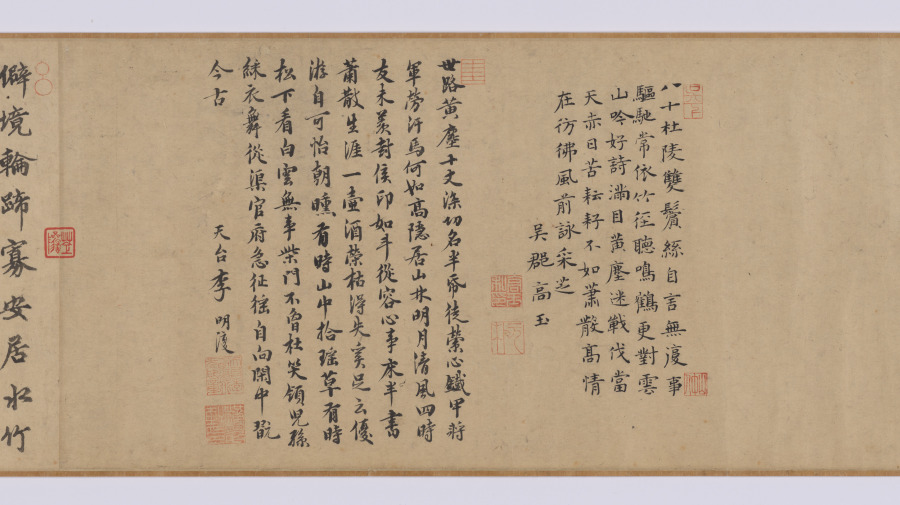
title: Leisure Enough to Spare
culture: China, Yuan dynasty (1271-1368)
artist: Yao Tingmei (Chinese, active mid-1300s)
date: 1360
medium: handscroll, ink on paper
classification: Painting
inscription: 至正廿年春正月_日作此併系鄙語于尾 地偏人遠閉柴關，滿院松陰白晝閒。 眼底風塵渾忘却，坐看流水臥看山。 吳興姚廷美畫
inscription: 23 colophons and 53 seals (dates unavailable for some): 1 colophon, dated 1360, and 2 seals of Yang Weizhen (1296-1370); 1 colophon and 3 seals of Wan Yi; 1 colophon of Zhang Junde; 1 colophon and 3 seals of Angji (act. ca. mid-14th c.); 1 colophon and 1 seal of Xu Shiquan; 1 colophon and 3 seals of Gao Yu; 1 colophon and 2 seals of Li Mingfu; 1 colophon and 2 seals of Lu Lin; 1 colophon and 1 seal of Zhang Qian; 1 colophon of Tao Tangwen; 1 colophon and 1 seal of Wu Yuangui (act. ca. 1300-60); 1 colophon of Bao Jiong; 1 colophon of Wang Zao; 1 colophon and 1 seal of Ma Chuyi; 1 colophon and 1 seal of Lin Yizhuang; 1 colophon and 1 seal of Gu Shunju; 1 colophon and 2 seals of Wang Jing; 1 colophon and 2 seals of Lin Shouchang; 1 colophon and 1 seal of Gao Zhidao; 1 colophon of Lin Xun; 1 colophon, dated 1359, and 2 seals of Meng Weicheng (act. mid-14th c.); 1 colophon and 1 seal of Meng Zhiji (act. mid-l4th c.); 14 seals of Liang Qingbiao 梁清標 (1620-1691); 1 poem dated 1755 and 5 seals of the Qianlong 乾隆 emperor (r. 1736-95); 2 seals of the Jiaqing 嘉慶 emperor (r. 1796-1821); 3 seals of the Xuantong 宣統 emperor (r. 1909-11).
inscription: Title on frontispiece by Zhang Bi 章弼: Signed Gongchen 拱辰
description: Seclusion and leisure—the ideals of the literati, or scholar-gentlemen—are expressed in this mature work by Yao Tingmei. The theme acquired special meaning at a time of the military uprisings near the end of the Yuan dynasty. Dedicated to an ascetic named Du, this work combines painting, calligraphy, and poetry; following the painting are more than 20 poems and essays written by notable scholars, one of whom was the calligrapher Yang Weizhen. It reveals not only the aesthetic taste of the literati but also the practice of contributing artistic and literary works to fulfill social obligations. Yao's painting demonstrates his individual style derived from various ancient masters (Guo Xi, Dong Yuan, and Juran). Yang Weizhen's calligraphy exhibits his bold, vigorous style and his intent to capture the spirit of antiquity in art.